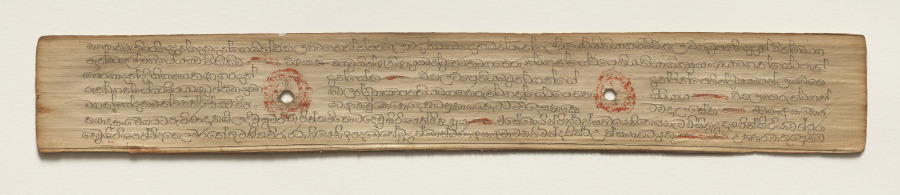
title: Leaf from a Buddhist Manuscript (verso)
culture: Sri Lanka, Singhalese, Late 17th century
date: c. 1700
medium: fiber paper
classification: Manuscript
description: Palm leaf material is still used for manuscripts in Sri Lanka. The palm leaves are prepared first by boiling them, drying them in the sun, and then rubbing them with oils. Scribes then use a metal stylus to incise the text. Then charcoal powder is wiped across the pages, filling in only the inscribed lines.